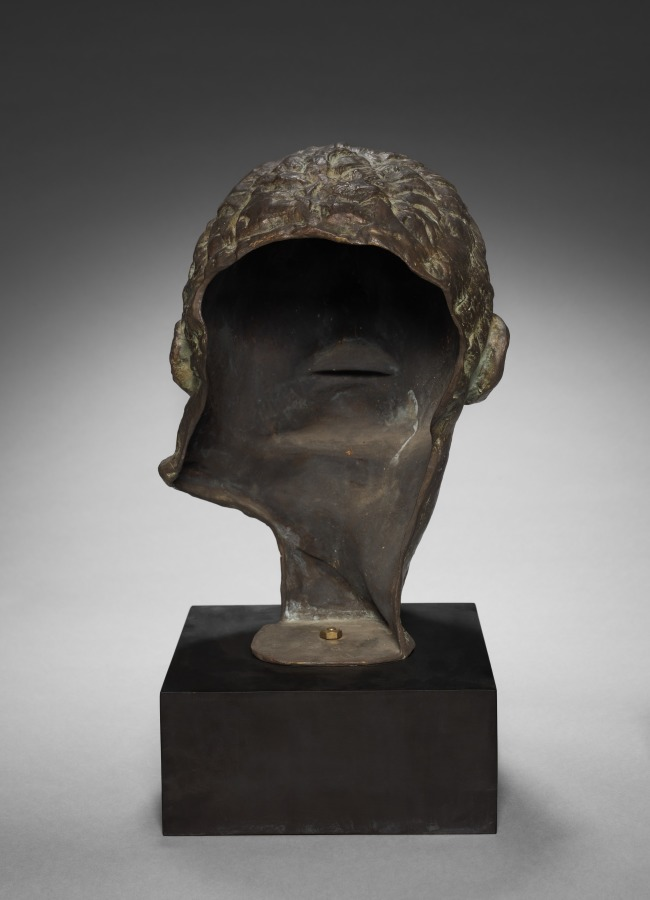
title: Mask of Hercules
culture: France, 20th century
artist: Emile Antoine Bourdelle (French, 1861–1929)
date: 1909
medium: bronze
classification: Sculpture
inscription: Inscribed at neck, lower left: "© Bourdelle"; beneath right ear: "E. Godard/Fondr Paris / 7"